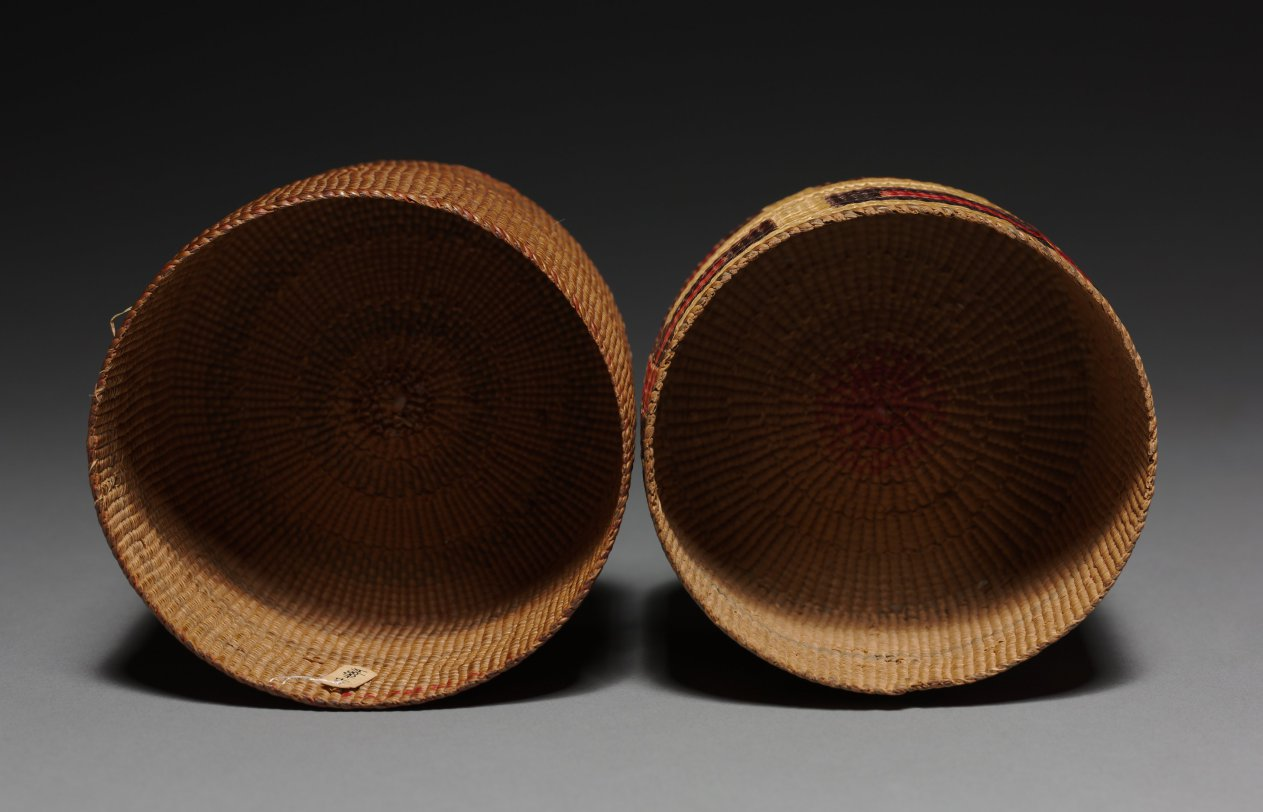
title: Telescoping basket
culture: Northwest Coast, Tlingit, 19th century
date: 1800's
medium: twined spruce root with grass false embroidery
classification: Basketry